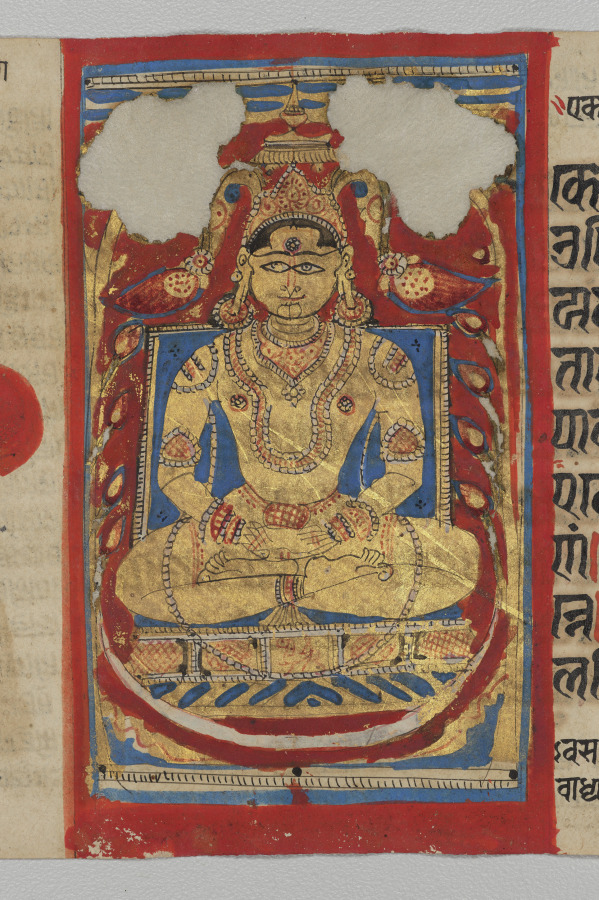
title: Mahavira in the Realm of Liberation (Nirvana), Folio 43 (verso), from a Kalpa-sutra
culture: Western India, Gujarat, last quarter of the 15th century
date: c. 1475–1500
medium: Gum tempera, ink, and gold on paper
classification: Painting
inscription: [[upper left]] Śrī Ma* nirvāṇa